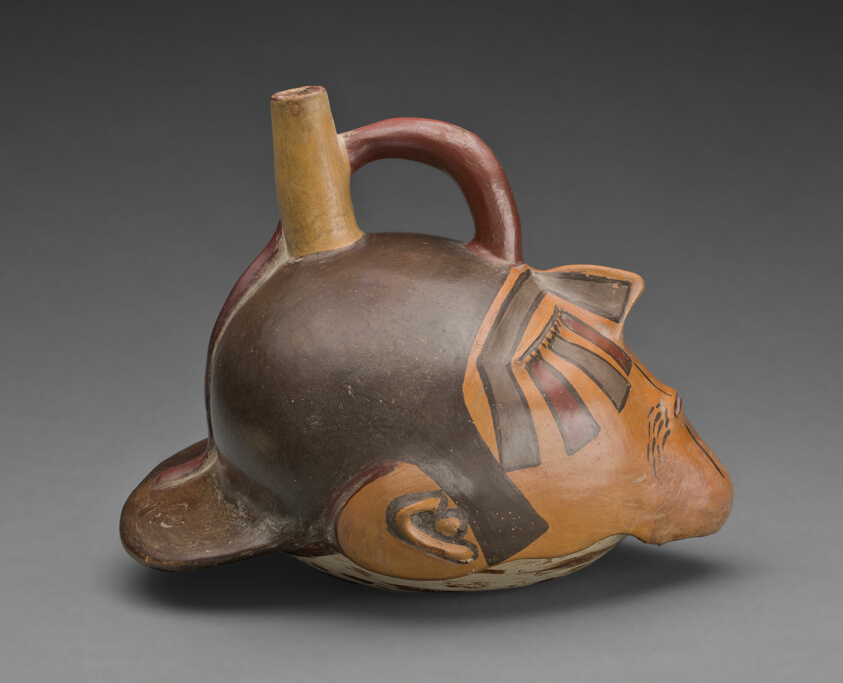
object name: Vessel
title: Bottle in the Form of a Severed Trophy Head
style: nazca, early intermediate period, Pre-Columbian, americas, andes, Arts of the Americas, andean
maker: Nazca; South coast, Peru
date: 180 BCE–500 CE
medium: Ceramic and pigment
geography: Peruvian South Coast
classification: earthenware; art of the americas; ceramics; vessel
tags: sacrifice, ritual sacrifices, rituals, death